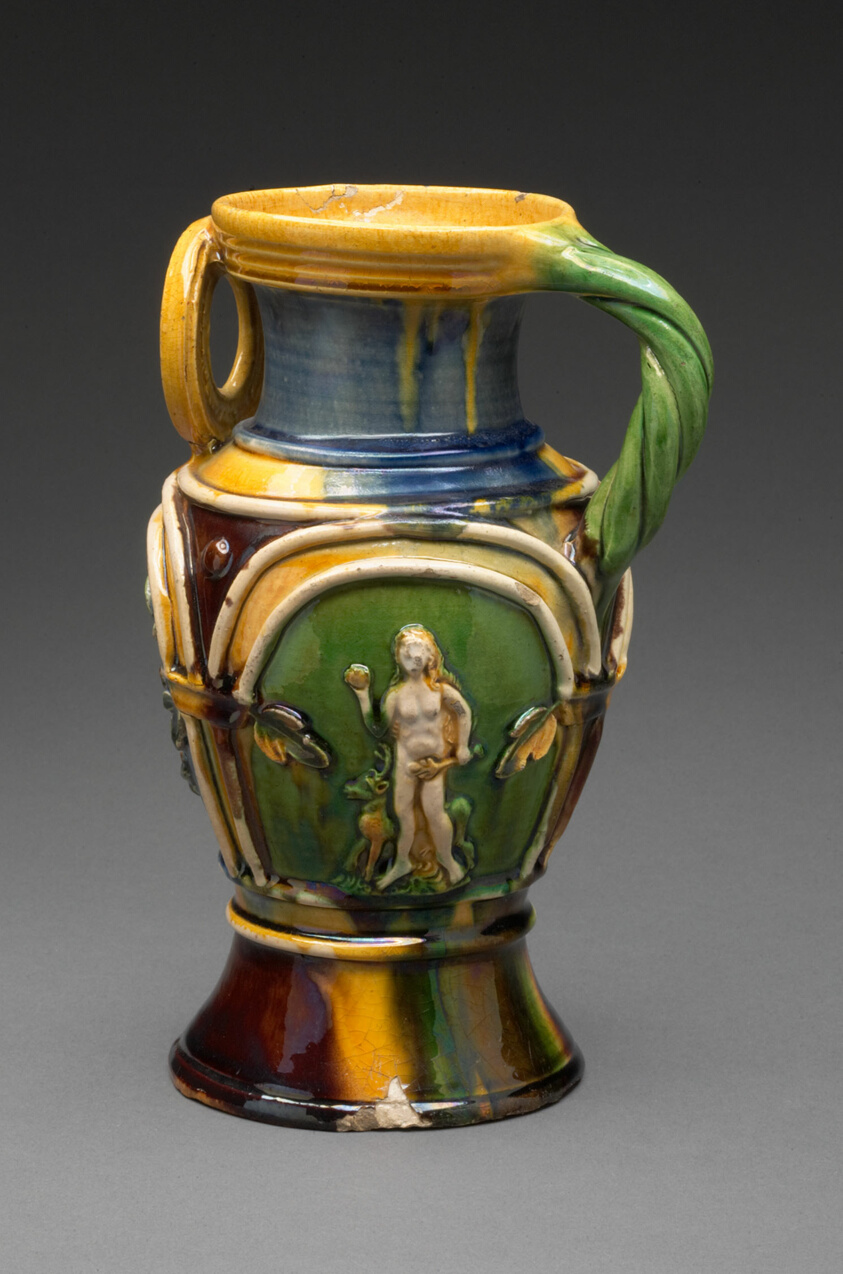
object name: Ceramics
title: Jug with Adam and Eve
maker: Attributed to Paul Preuning, (German, active c.1540-50); Nuremberg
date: c. 1550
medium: Earthenware, polychrome glaze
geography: Nuremberg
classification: earthenware; ceramics; european decorative arts; decorative arts